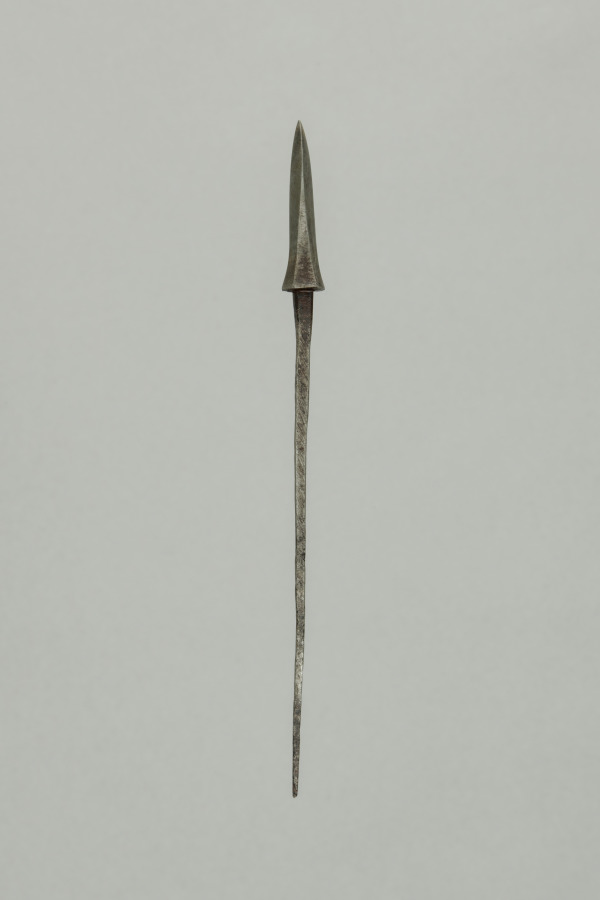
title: Arrow Point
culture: Japan, Edo period (1615–1868)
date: 1700s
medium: steel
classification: Arms and Armor